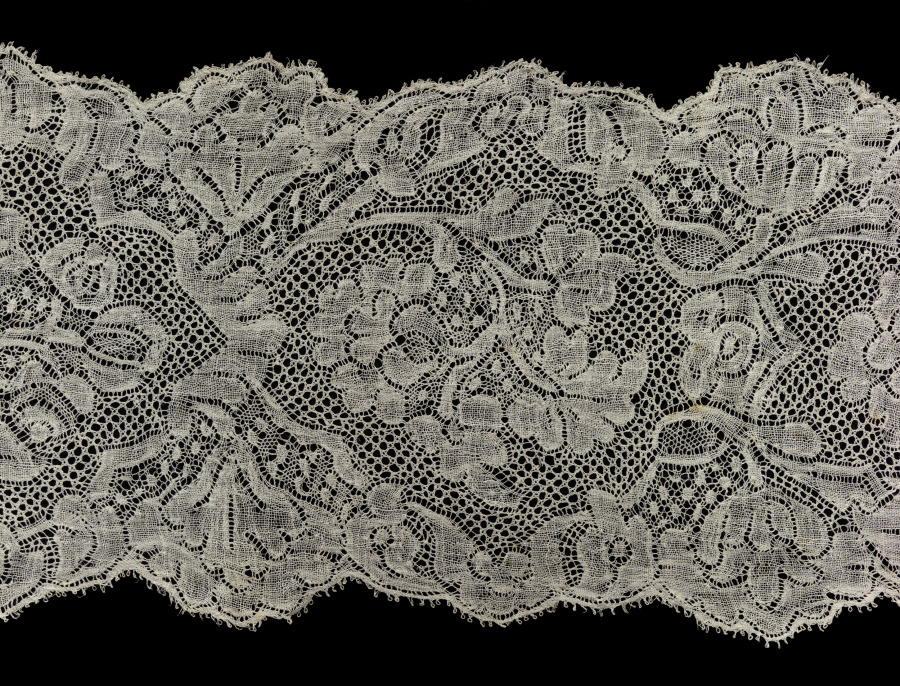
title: Lace Lappet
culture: Belgium, Binche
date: 1700s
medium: Linen: bobbin lace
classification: Lace